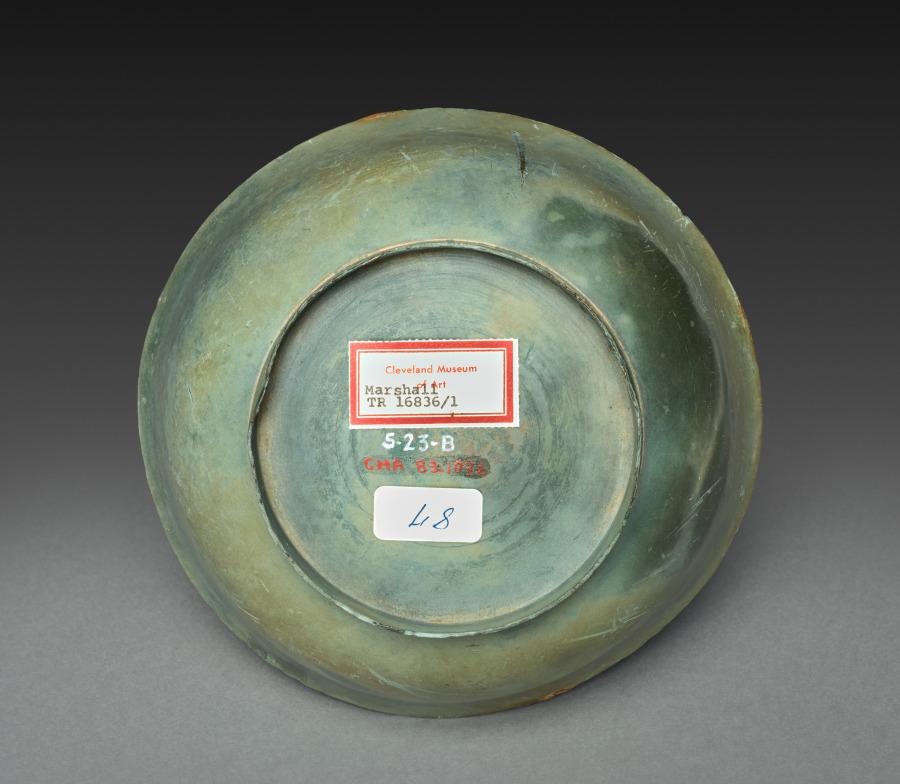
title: Bowl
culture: Korea, Joseon dynasty (1392–1910)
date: 1700s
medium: bronze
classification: Metalwork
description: In ancestor veneration rituals, deceased parents or ancestors are sanctified as spirits who are believed to oversee their descendants. Three times a year, once at the lunar new year, once at the person’s death date, and once at the time of the mid-autumn festival, food would be placed on the table for the ancestors, including fruits, rice, meat, and rice wine. During these ceremonies the worshippers’ attitude was as reverential toward the objects meant to embody the ancestors’ spirits as that toward a living parent. This cup may have been used for ancestral rituals to contain rice wine.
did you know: This bronze bowl may have been used in family rituals such as ancestral worship ceremonies in the Joseon period.